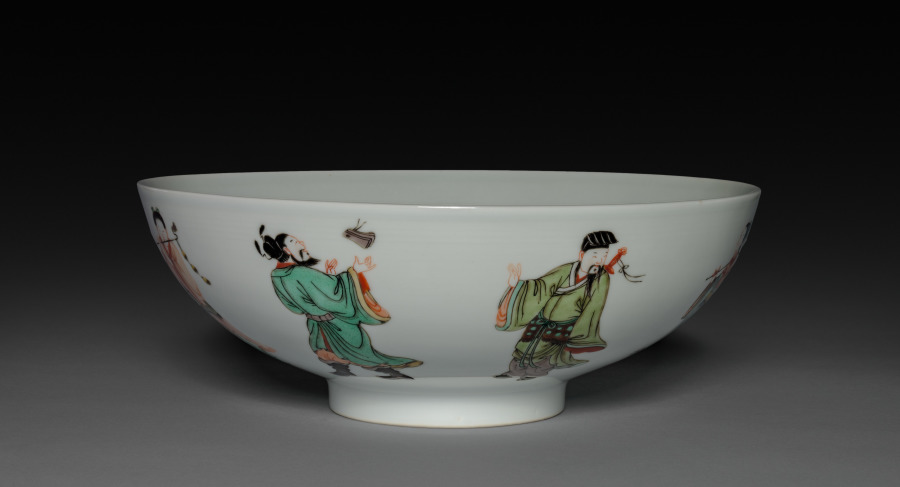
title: Bowl with Eight Immortals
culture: China, Jiangxi province, Jingdezhen kilns, Qing dynasty (1644-1911), Kangxi reign (1662-1722)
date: 1662–1722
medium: porcelain with famille verte overglaze enamel decoration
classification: Ceramic